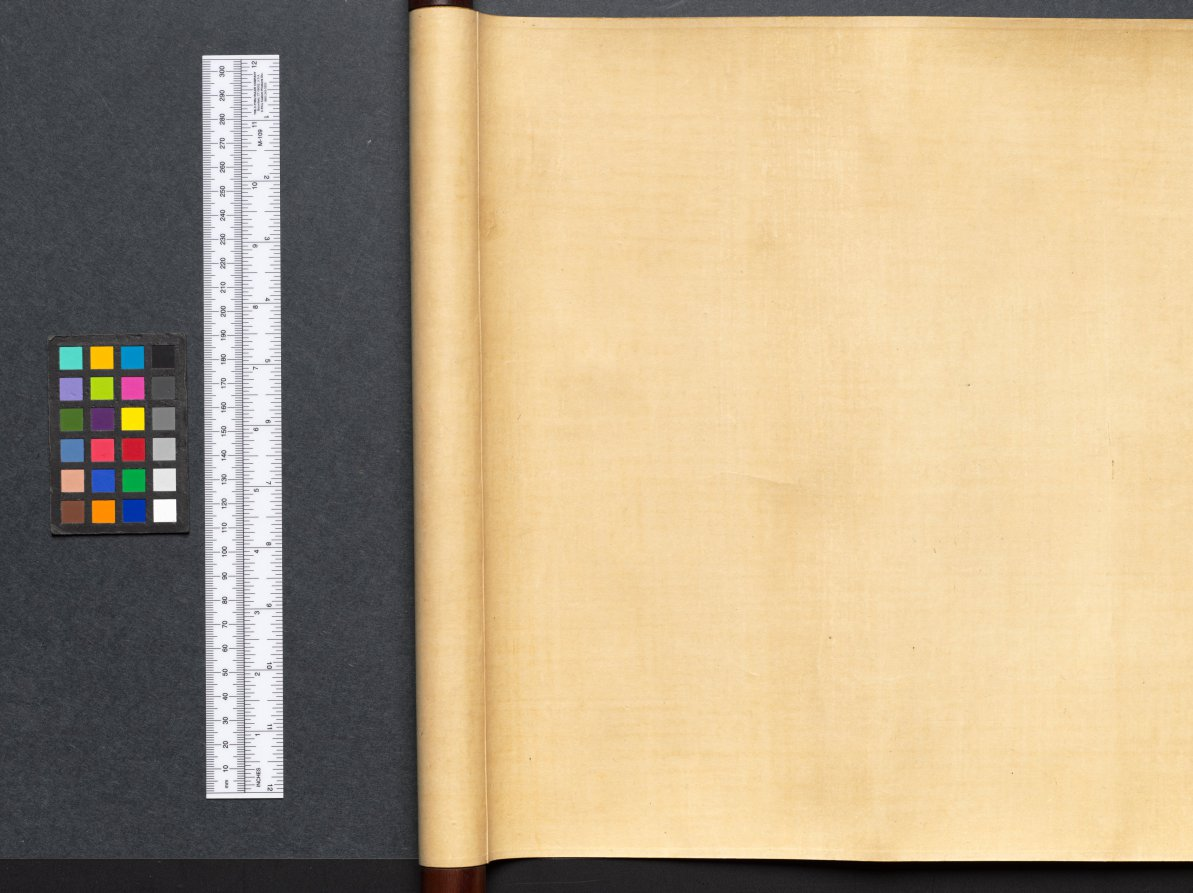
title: People Fleeing from a Fire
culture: Japan, Edo period (1615–1868)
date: 1615–1868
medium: Handscroll; color and gold on paper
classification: Painting